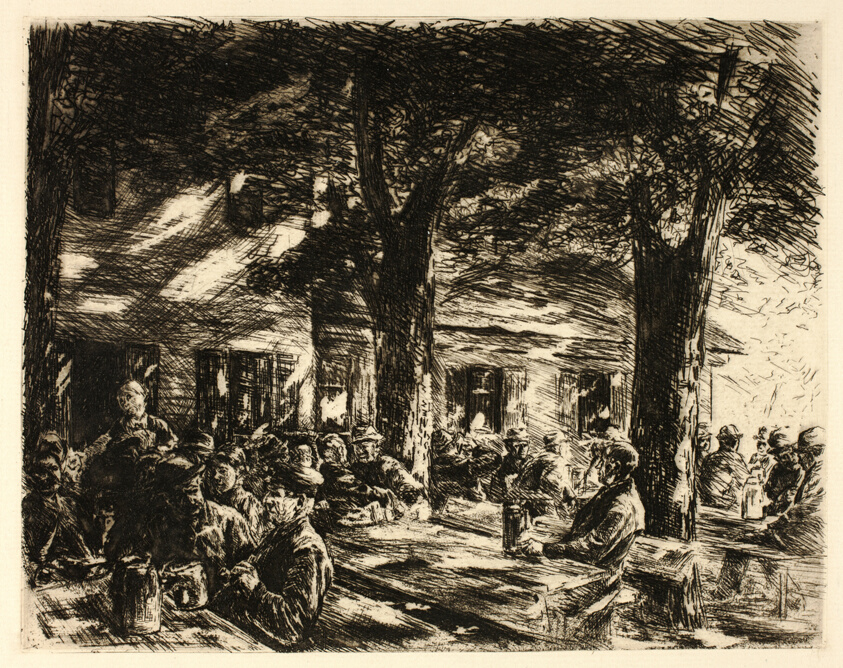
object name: Print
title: Beer Garden in Rosenheim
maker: Max Liebermann (German, 1847-1935); later published by Pan (German and French, 1895-1900)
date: 1895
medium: Etching on cream laid paper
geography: Germany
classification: etching; print; prints and drawing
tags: gardens